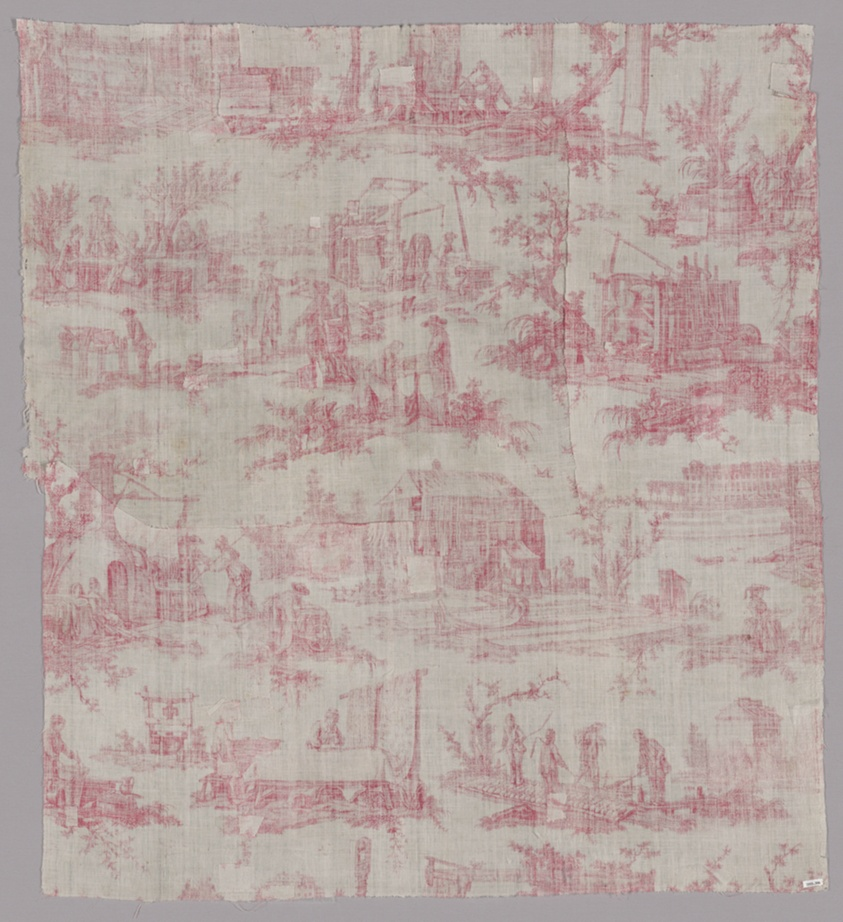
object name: Textile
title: Les Travaux de la Manufacture (The Activities of the Factory) (Furnishing Fabric)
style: jouy-en-Josas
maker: Designed by Jean Baptiste Huet (French, 1745–1811); Manufactured by Christophe-Philippe Oberkampf (naturalized French, 1738-1815), Oberkampf Manufactory (French, 1760-1843); Jouy-en-Josas, France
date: 1783/84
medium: Cotton, plain weave; copper-plate printed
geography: Jouy-en-Josas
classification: textile; weaving - printed; printed textile; furnishing textile